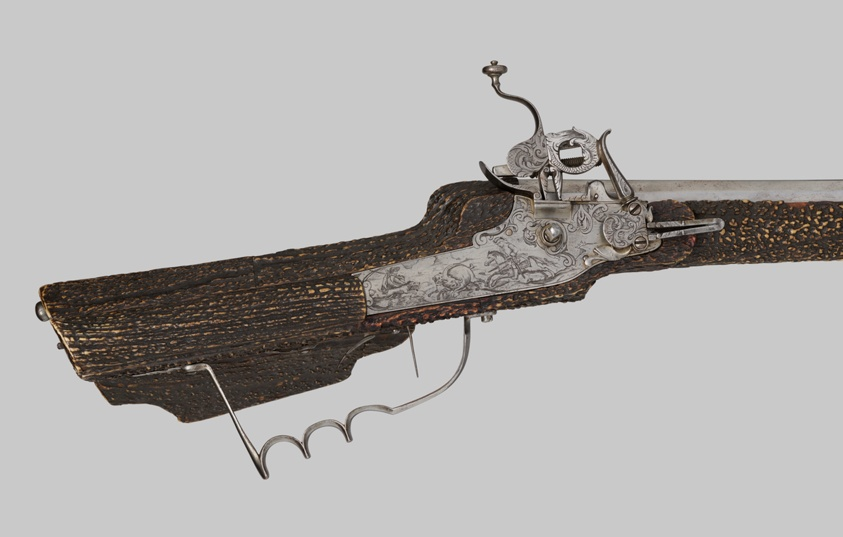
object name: Arms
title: Wheellock Rifle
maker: Elias Becker (German, Augsburg active 1633-1673); Augsburg, Germany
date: c. 1670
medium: Steel, staghorn, cherry wood, beech wood, gilt brass, copper, and enamel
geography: Augsburg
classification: firearm-long gun; arms; decorative arts; european decorative arts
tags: arms